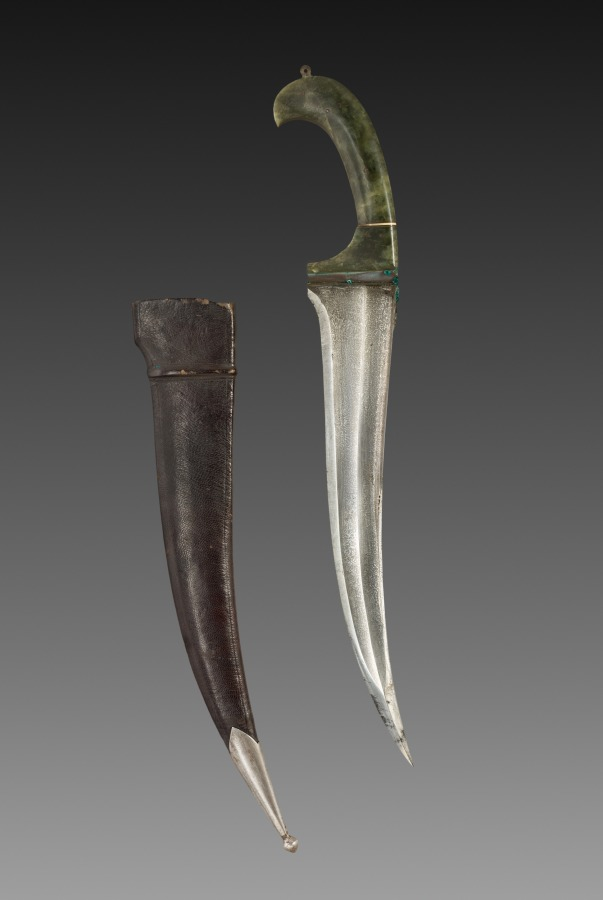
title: Dagger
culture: India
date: 1800s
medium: iron with bone and silver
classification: Arms and Armor